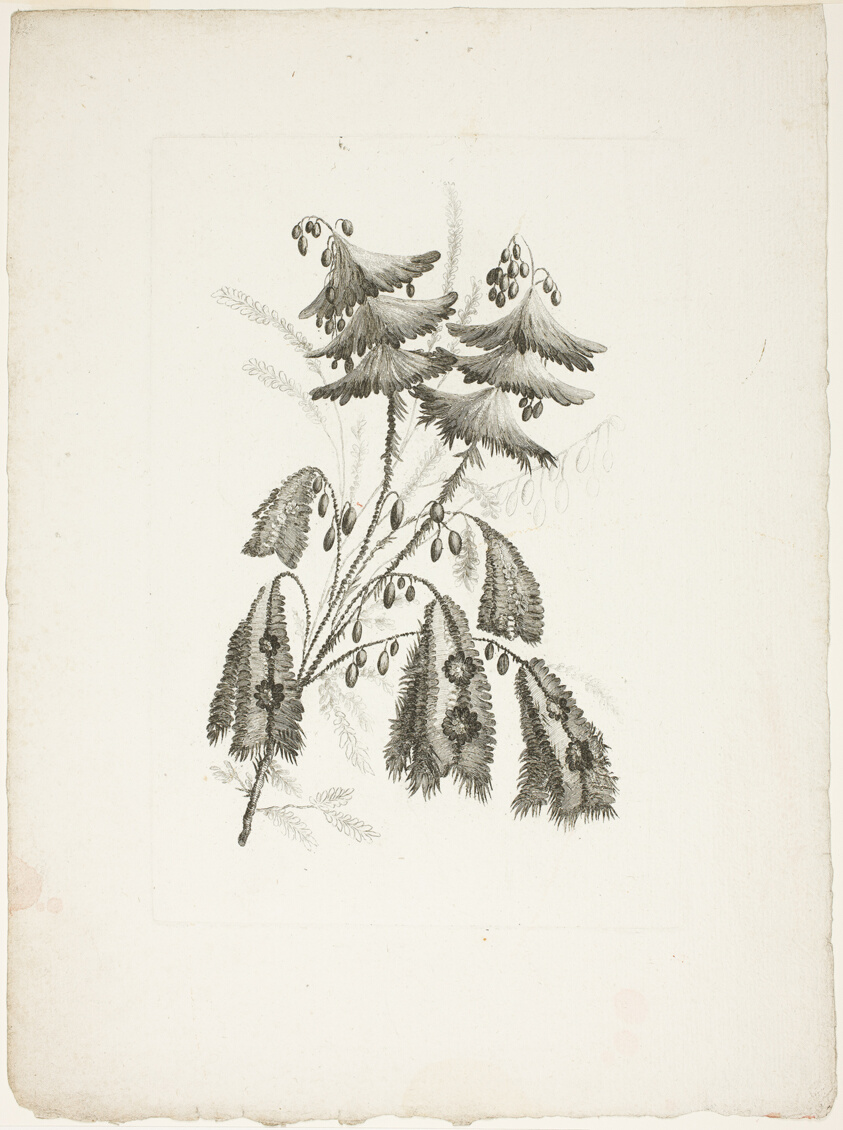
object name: Print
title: Bouquet, from Collection of New Flowers of Taste for the Manufacture of Persian Cloth, Invented and Drawn by Jean Pillement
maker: Johann Heinrich Hess (Germany, born 1746); after Jean-Baptiste Pillement (French, 1728-1808); published by Charles Leviez (French, 1708-1778)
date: 1765/70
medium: Etching on ivory laid paper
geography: Germany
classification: etching; print; prints and drawing